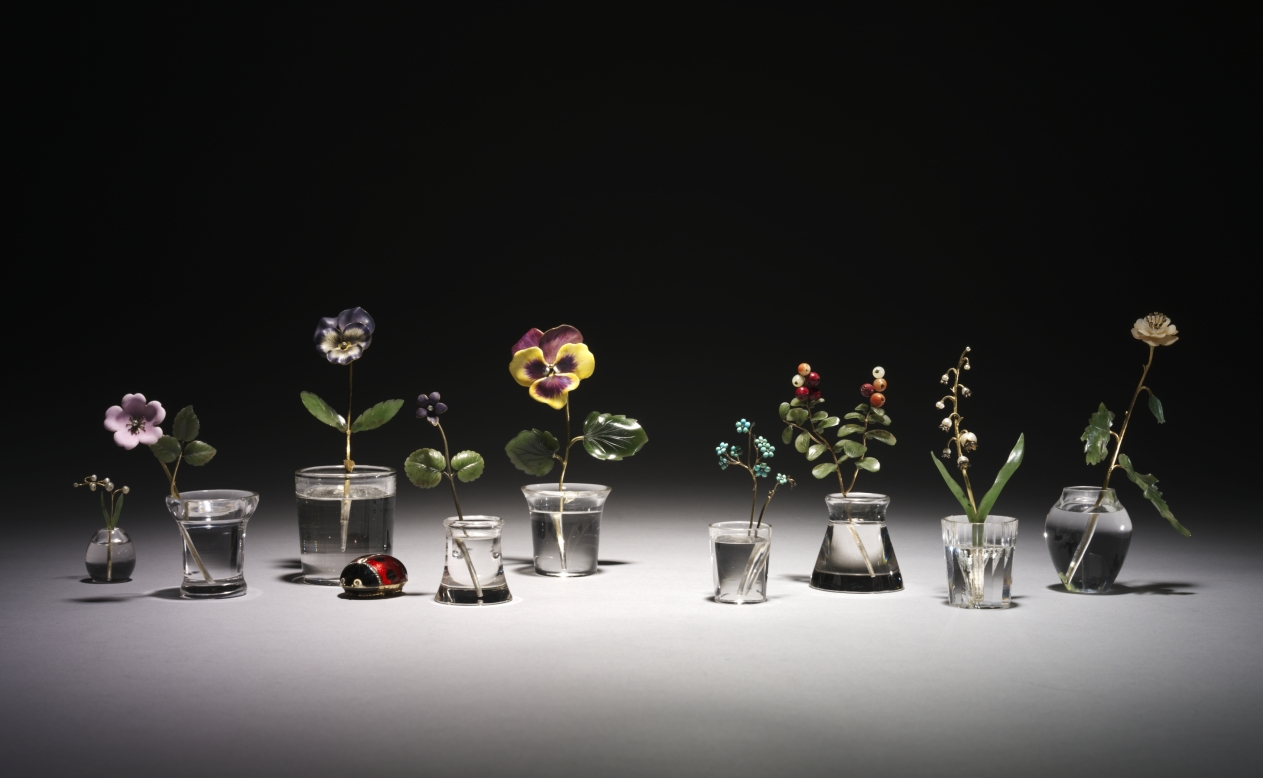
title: Flower Study of Forget-Me-Nots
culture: Russia, St. Petersburg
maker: House of Fabergé (Russian, 1842–1918)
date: c. 1885–1915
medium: turquoise, diamonds, rock crystal, silver gilt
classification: Miscellaneous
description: These delicate flowers, resembling a bouquet of forget-me-nots, are composed of finely rounded turquoise stones set around rose-cut diamonds on silver-gilt stems placed in rock crystal pots. Fabergé’s inspiration for his flower studies is said to have come from the floral brooches of precious stones that were made in the 1700s for Catherine the Great as well as from the Japanese art of flower arranging, known as ikebana. Fabergé’s flower studies were given as intimate gifts to friends by the tsarina and others in the court. She also liked to take them around to wherever the imperial family was residing as a reminder of spring during the harsh Russian winters.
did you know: The stems of Fabergé’s flower studies are set into little basins carved from rock crystal to resemble pots of water.